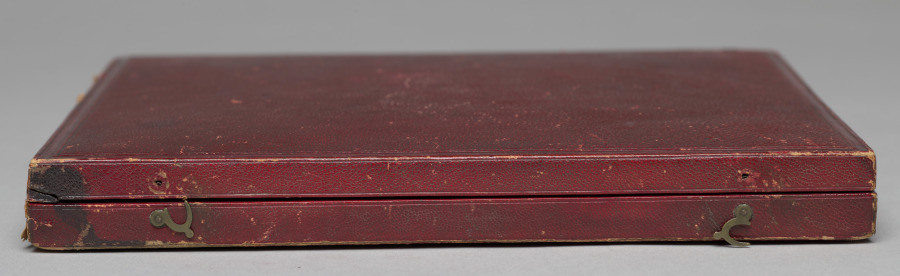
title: English family of seven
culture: England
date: c. 1840s-1850s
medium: daguerreotype, half-plate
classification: Photograph